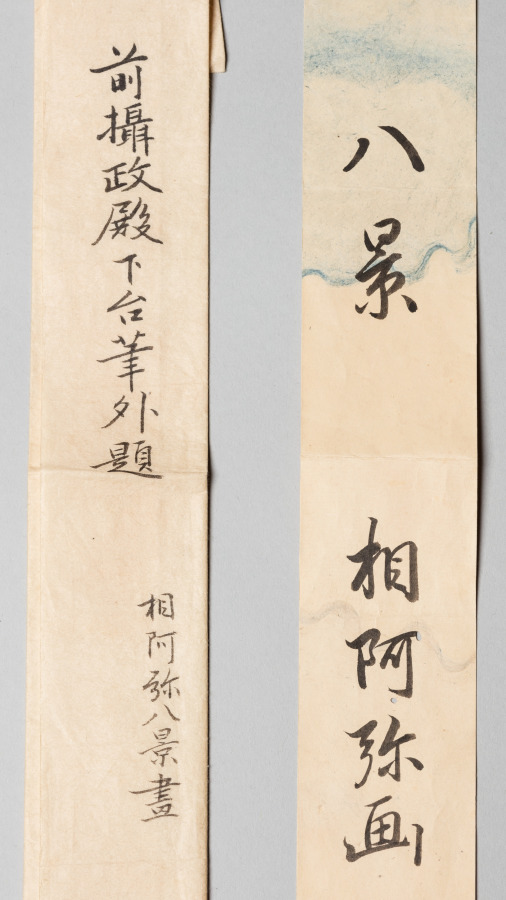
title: Landscape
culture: Japan, Edo period (1615–1868)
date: early 1600s to mid-1800s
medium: hanging scroll; ink on paper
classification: Painting